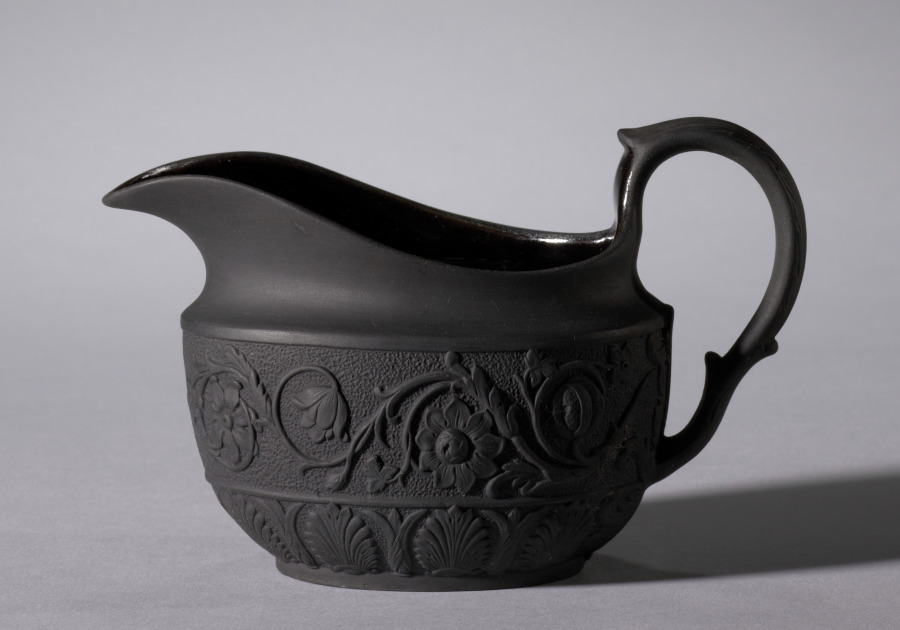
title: Creamer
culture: England, 19th century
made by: Elijah Mayer (British, c. 1770–1805)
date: c. 1810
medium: black basalt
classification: Ceramic